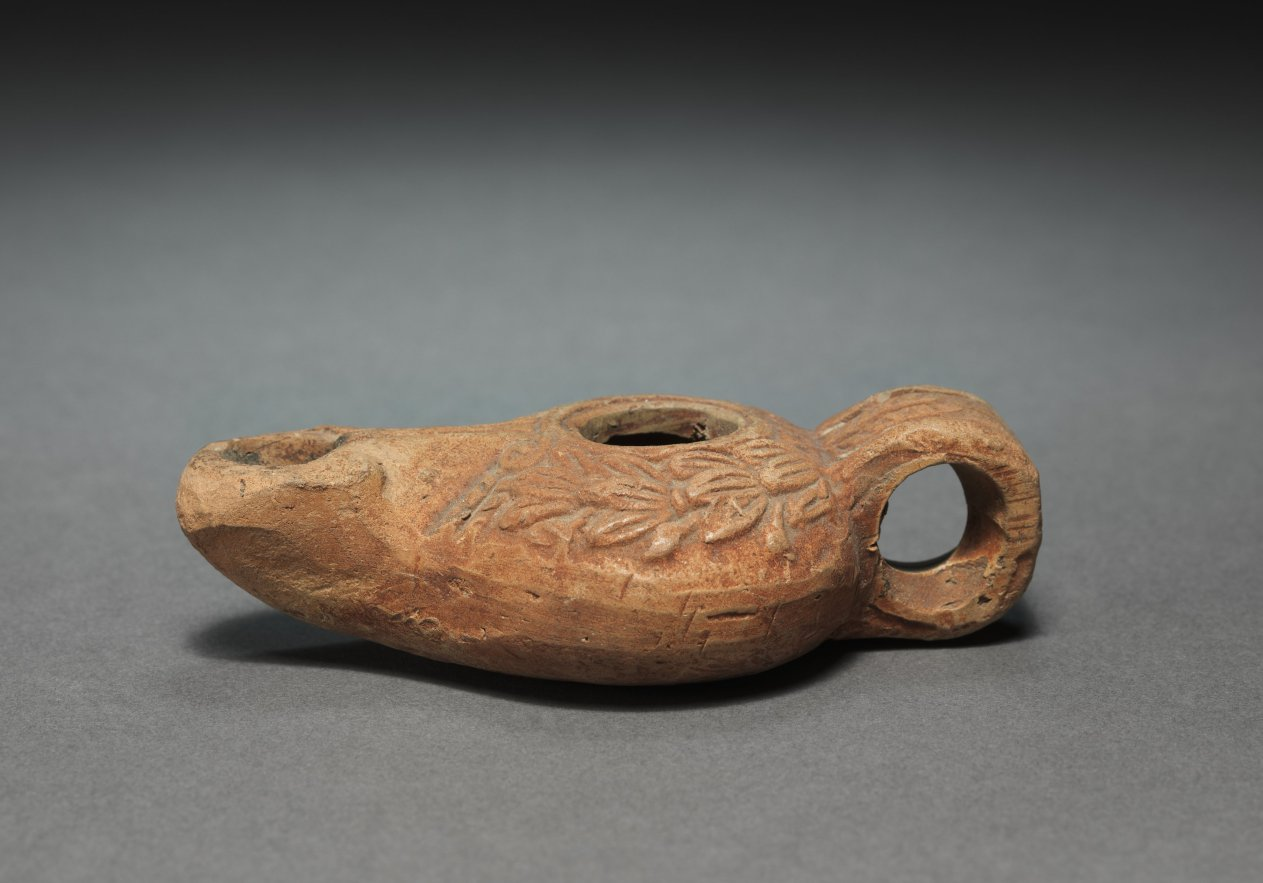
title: Lamp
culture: Parthian Empire (247 BCE–224 CE)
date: 1–200 CE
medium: terracotta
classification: Ceramic